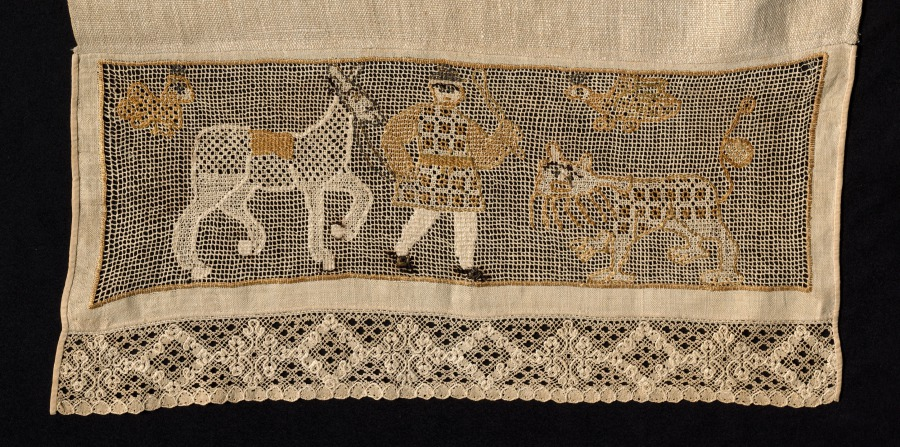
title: Towel with Border of Figures of Men and Animals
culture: Russia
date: 1700s–1800s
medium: Linen: needle lace (cutwork and drawnwork), straight (continuous) bobbin lace, tape lace edging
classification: Lace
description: On each end of this cloth is a lace border depicting a man walking with his mule and two birds flying above. The man and his mule are approached by a large feline, perhaps a panther, which is a common motif in Russian textiles. Metallic and colored silk threads are used to render the figures and create individualized details.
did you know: Handmade lace for marriage dowries was produced in large quantities in Russia during the eighteenth and nineteenth centuries.